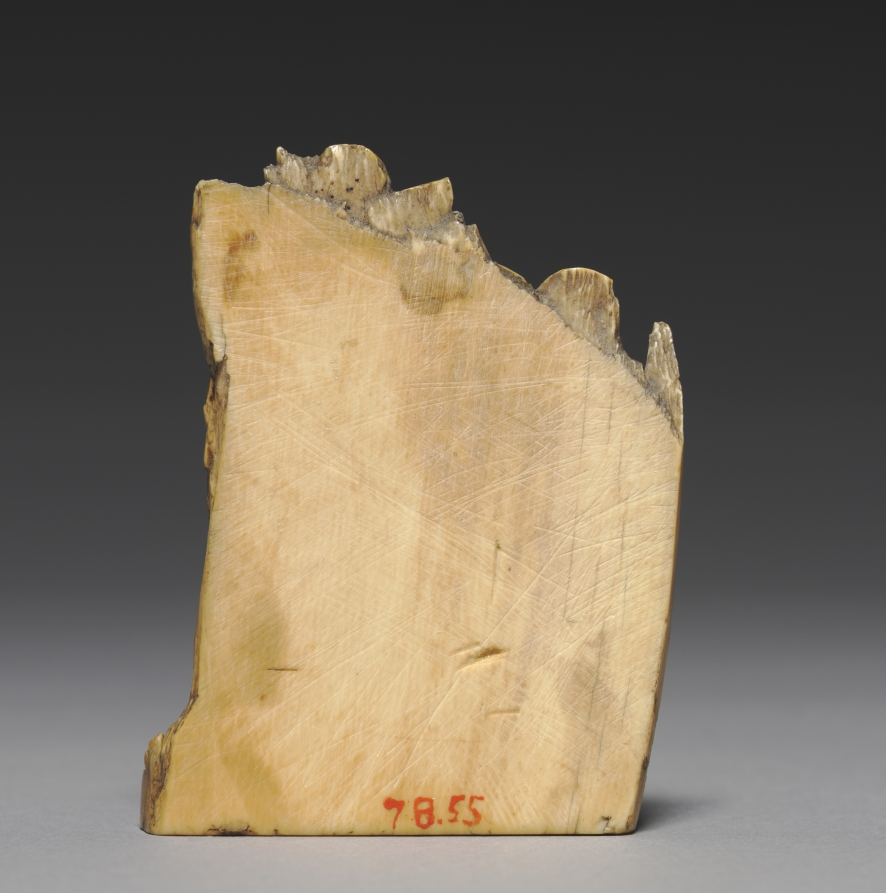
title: The Crucifixion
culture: France, Paris?, Gothic period, late 13th-early 14th century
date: c. 1290–1320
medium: ivory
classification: Ivory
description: Flanking the crucified Christ, the figures of Longinus and the Virgin appear on this fragment of an exquisitely carved ivory panel. Now lost are the figures of Stephaton and Saint John. However, Stephaton’s right foot and the vinegar-soaked sponge on a pole are still visible where the ivory breaks off.